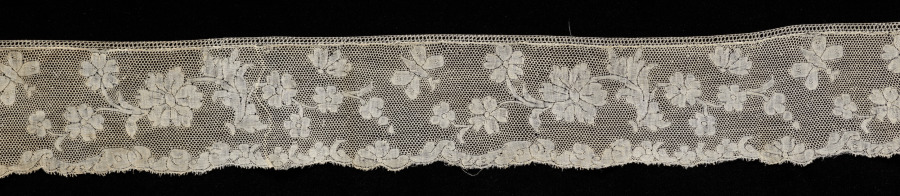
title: Lace Edging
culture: France, Valenciennes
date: 1700s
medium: Bobbin lace (Valenciennes)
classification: Lace